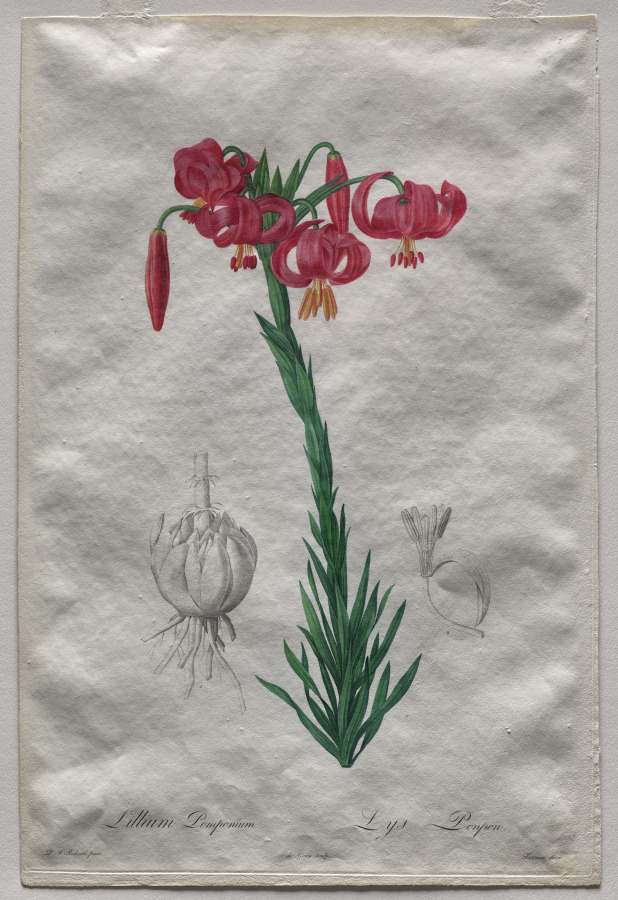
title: Lillium Pomponium (Turban Lily), plate 7 from Les Liliacées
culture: France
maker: De Gouy (French, 1670–1830)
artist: after Pierre-Joseph Redouté (French, 1759–1840)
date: 1802–16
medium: stipple engraving with hand coloring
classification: Print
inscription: Watermark: A. CORTALIN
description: The Belgian Pierre-Joseph Redouté became the most celebrated botanical illustrator of his day, serving as court painter in France to Marie Antoinette and later, the Empress Josephina. Called the “Raphaël des fleurs” (Raphael of flowers), he published two lavish collections of his botanical illustrations that were reproduced as stipple engravings, printed in color, and finished with painting by hand. This is one plate from the eight-volume Les Liliacées (1802–1816), which is devoted to the lily family—plants that grow from bulbs, corms, or tubers.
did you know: The artist's great-grandfather, grandfather, father, and two brothers all earned their living as artists.